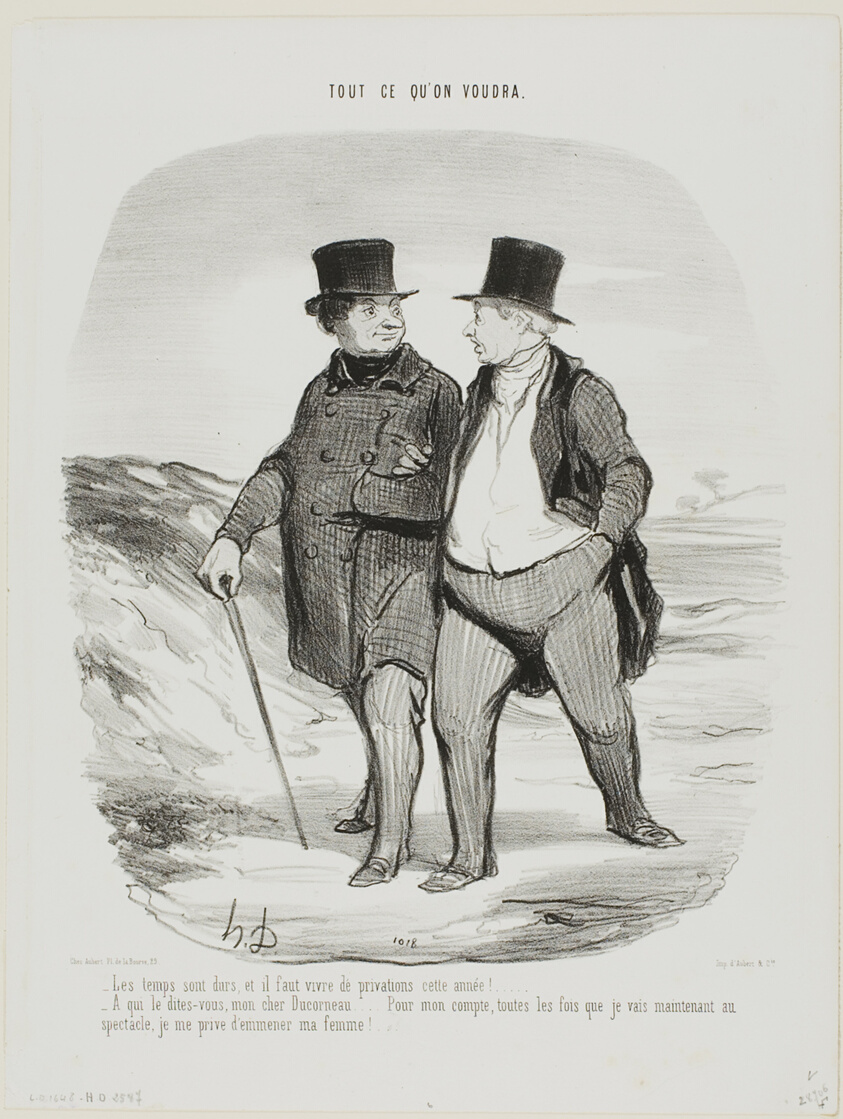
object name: Print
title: “- Times are difficult; this year we must learn to be more modest... - Don't tell me, my dear Ducorneau.... as far as I am concerned, every time I go to the theatre I now deny myself the company of my wife....,” plate 2 from Tout Ce Qu'on Voudra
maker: Honoré Victorin Daumier; French, 1808-1879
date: 1847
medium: Lithograph in black on white wove paper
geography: France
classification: lithograph; print; prints and drawing